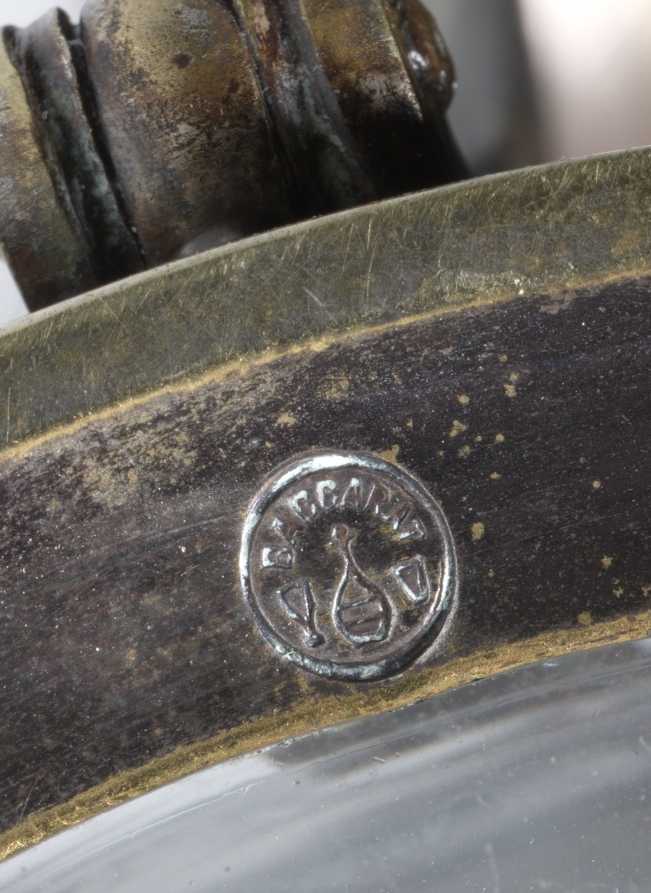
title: Pitcher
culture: France, 19th century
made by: Baccarat glasshouse (French)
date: c. 1880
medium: glass with metal mounts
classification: Glass